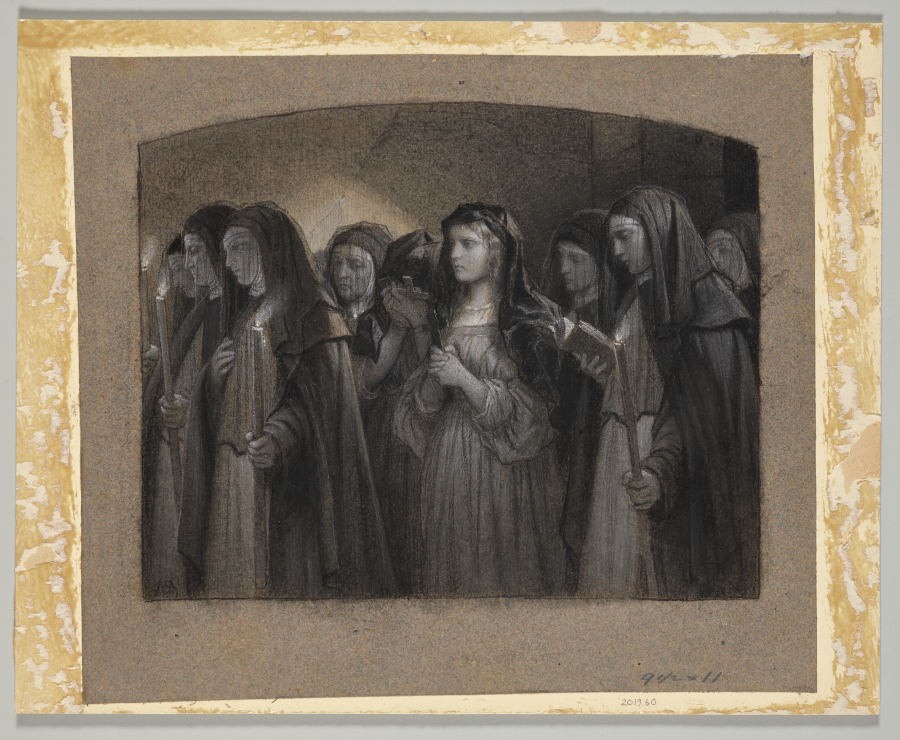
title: Nuns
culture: France, 19th century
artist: Anonymous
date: mid-1800s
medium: black and white chalk on gray laid paper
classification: Drawing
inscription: Inscribed, at lower left, in black chalk, illegible (“PD”?)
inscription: Inscribed, at lower right, in pencil, “9 ½ x 11”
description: In this drawing, a group of young nuns gather to pray. The unknown French artist used white chalk to delicately highlight the central figure with clasped hands. The work suggests the new style and subject matter that proliferated throughout France during the mid-19th century when an emerging middle-class audience became interested in collecting art and viewing it in exhibitions such as the Paris Salon.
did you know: This drawing’s anonymous artist used a combination of black and white chalk to create a dramatic pattern of highlights and shadows.